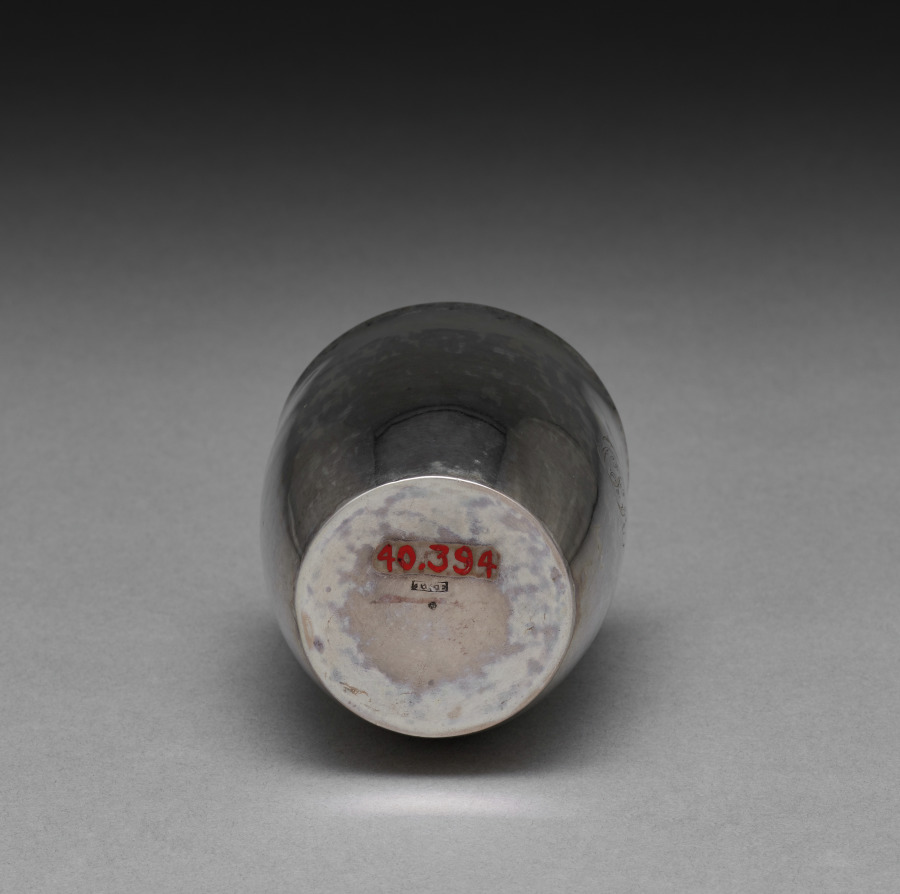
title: Beaker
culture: America, Massachusetts, Boston, 19th century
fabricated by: Thomas Knox Emery (American, 1781–1815)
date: 1805–1815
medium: silver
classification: Silver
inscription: engraved "CSR" in bright-cut script on body.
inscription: Stamped underside: "T.K.E."